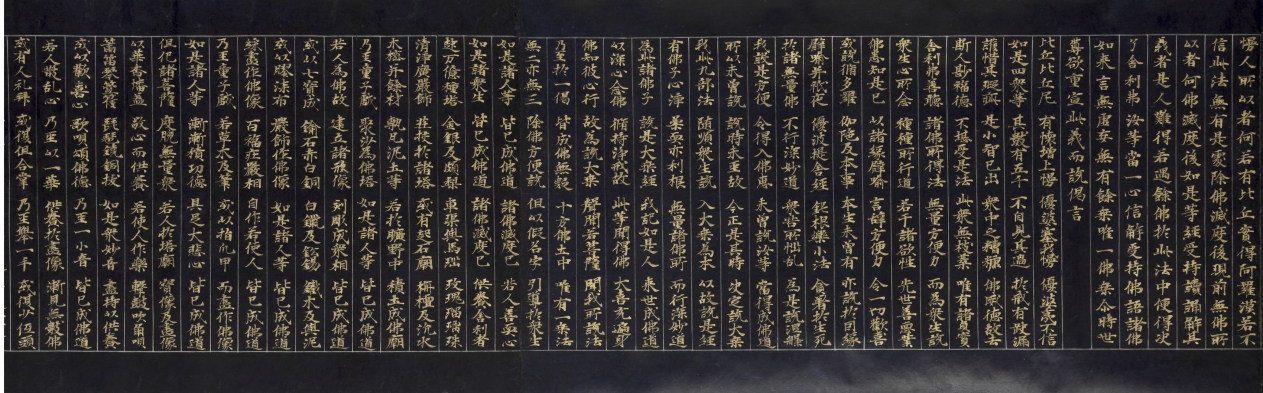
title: Lotus Sutra with a Frontispiece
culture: China, Song dynasty (960–1279)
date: late 1100s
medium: handscroll; gold ink on indigo sutra paper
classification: Painting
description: The frontispiece of this sutra, a sacred Buddhist scripture, illustrates episodes mentioned in the Buddha’s teaching. The sutra begins with a description of the historic Buddha Shakyamuni’s assembly on Vulture Peak. On the right, the Buddha sits amid members of his congregation: lohans (or arhats), bodhisattvas, gods, and other beings. The narrative proceeds from right to left. Heavenly light emanates from Shakyamuni’s brow to “illuminate the eighteen thousand worlds to the east.” Illustrated immediately below the ray is the sutra’s promise that if anyone carves or paints images of the Buddha “they will achieve the Buddha path.” The female figures in the frontispiece point to another promise made in this popular Mahayana school sutra, namely that female devotees and nuns who read the sutra are promised Buddhahood and salvation.